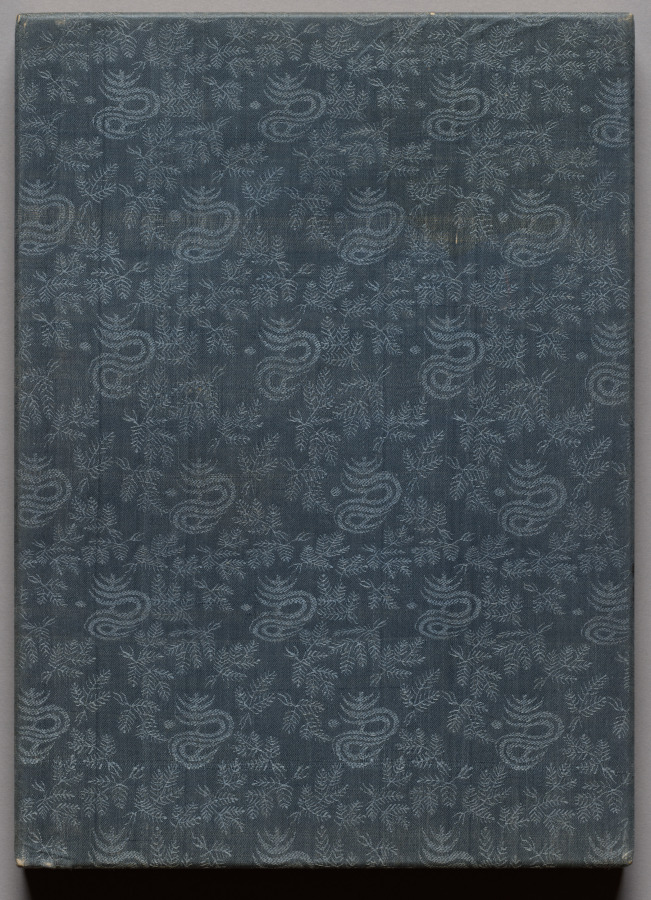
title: Album of Paintings by Haizan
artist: Yoshitsugu Haizan (Japanese, 1846–1915)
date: late 1800s-early 1900s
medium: double-sided accordion album; ink and color on paper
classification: Bound Volume